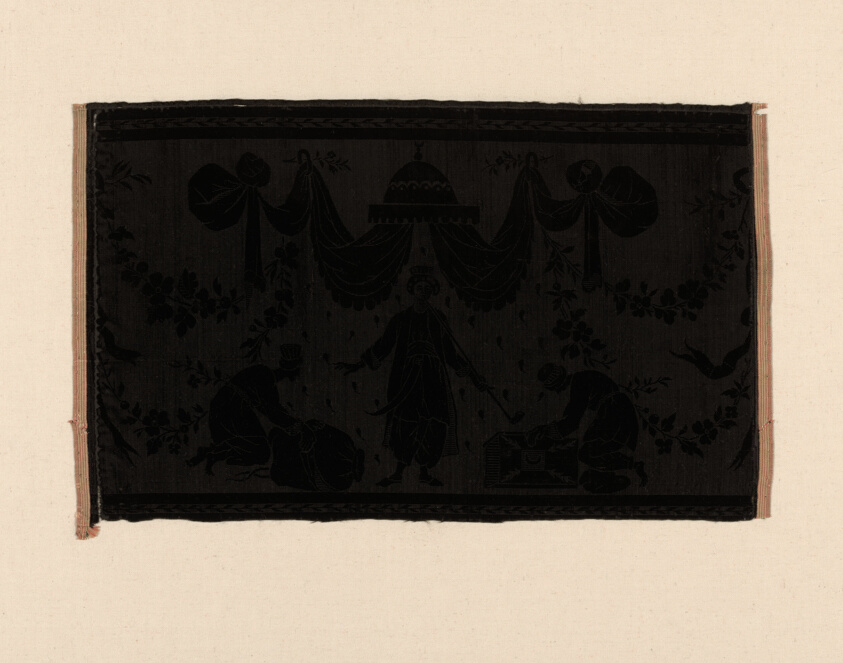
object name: Textile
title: Border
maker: France or Italy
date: 1700/25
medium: Silk, warp-float faced 3:1 broken warp chevron twill weave with supplementary pile warps forming cut and uncut solid velvet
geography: France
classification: textile; weaving - velvet